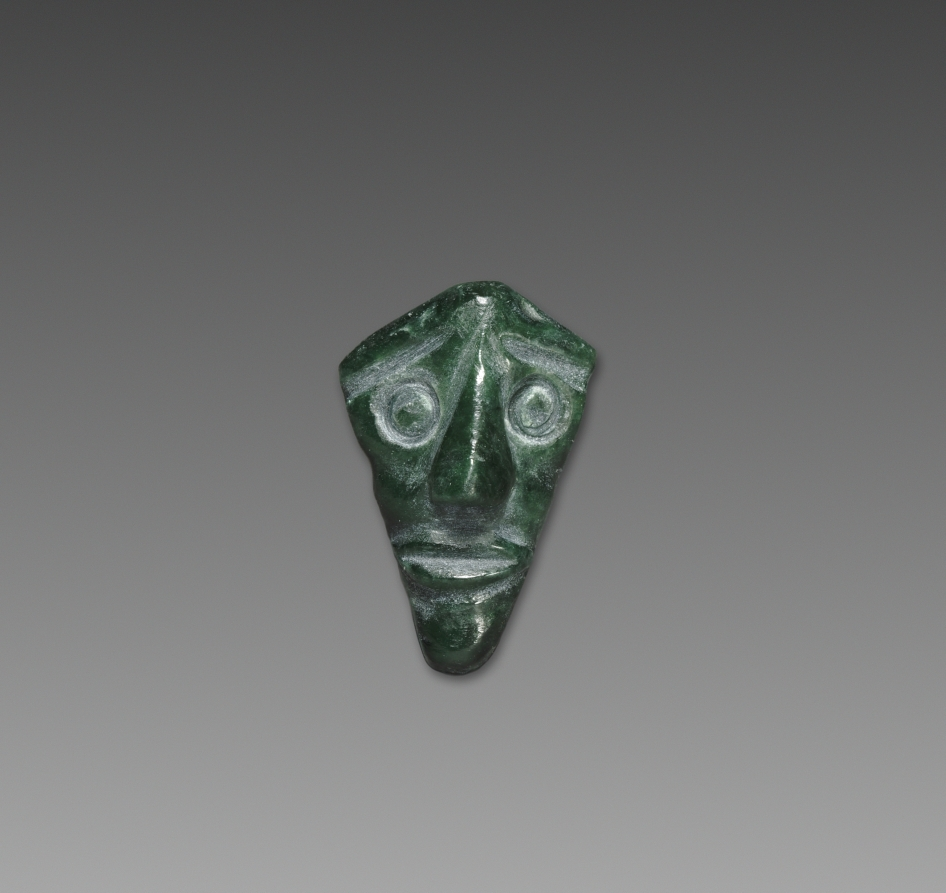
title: Head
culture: Mesoamerica, Pre-Columbian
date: before 1519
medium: serpentine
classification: Sculpture